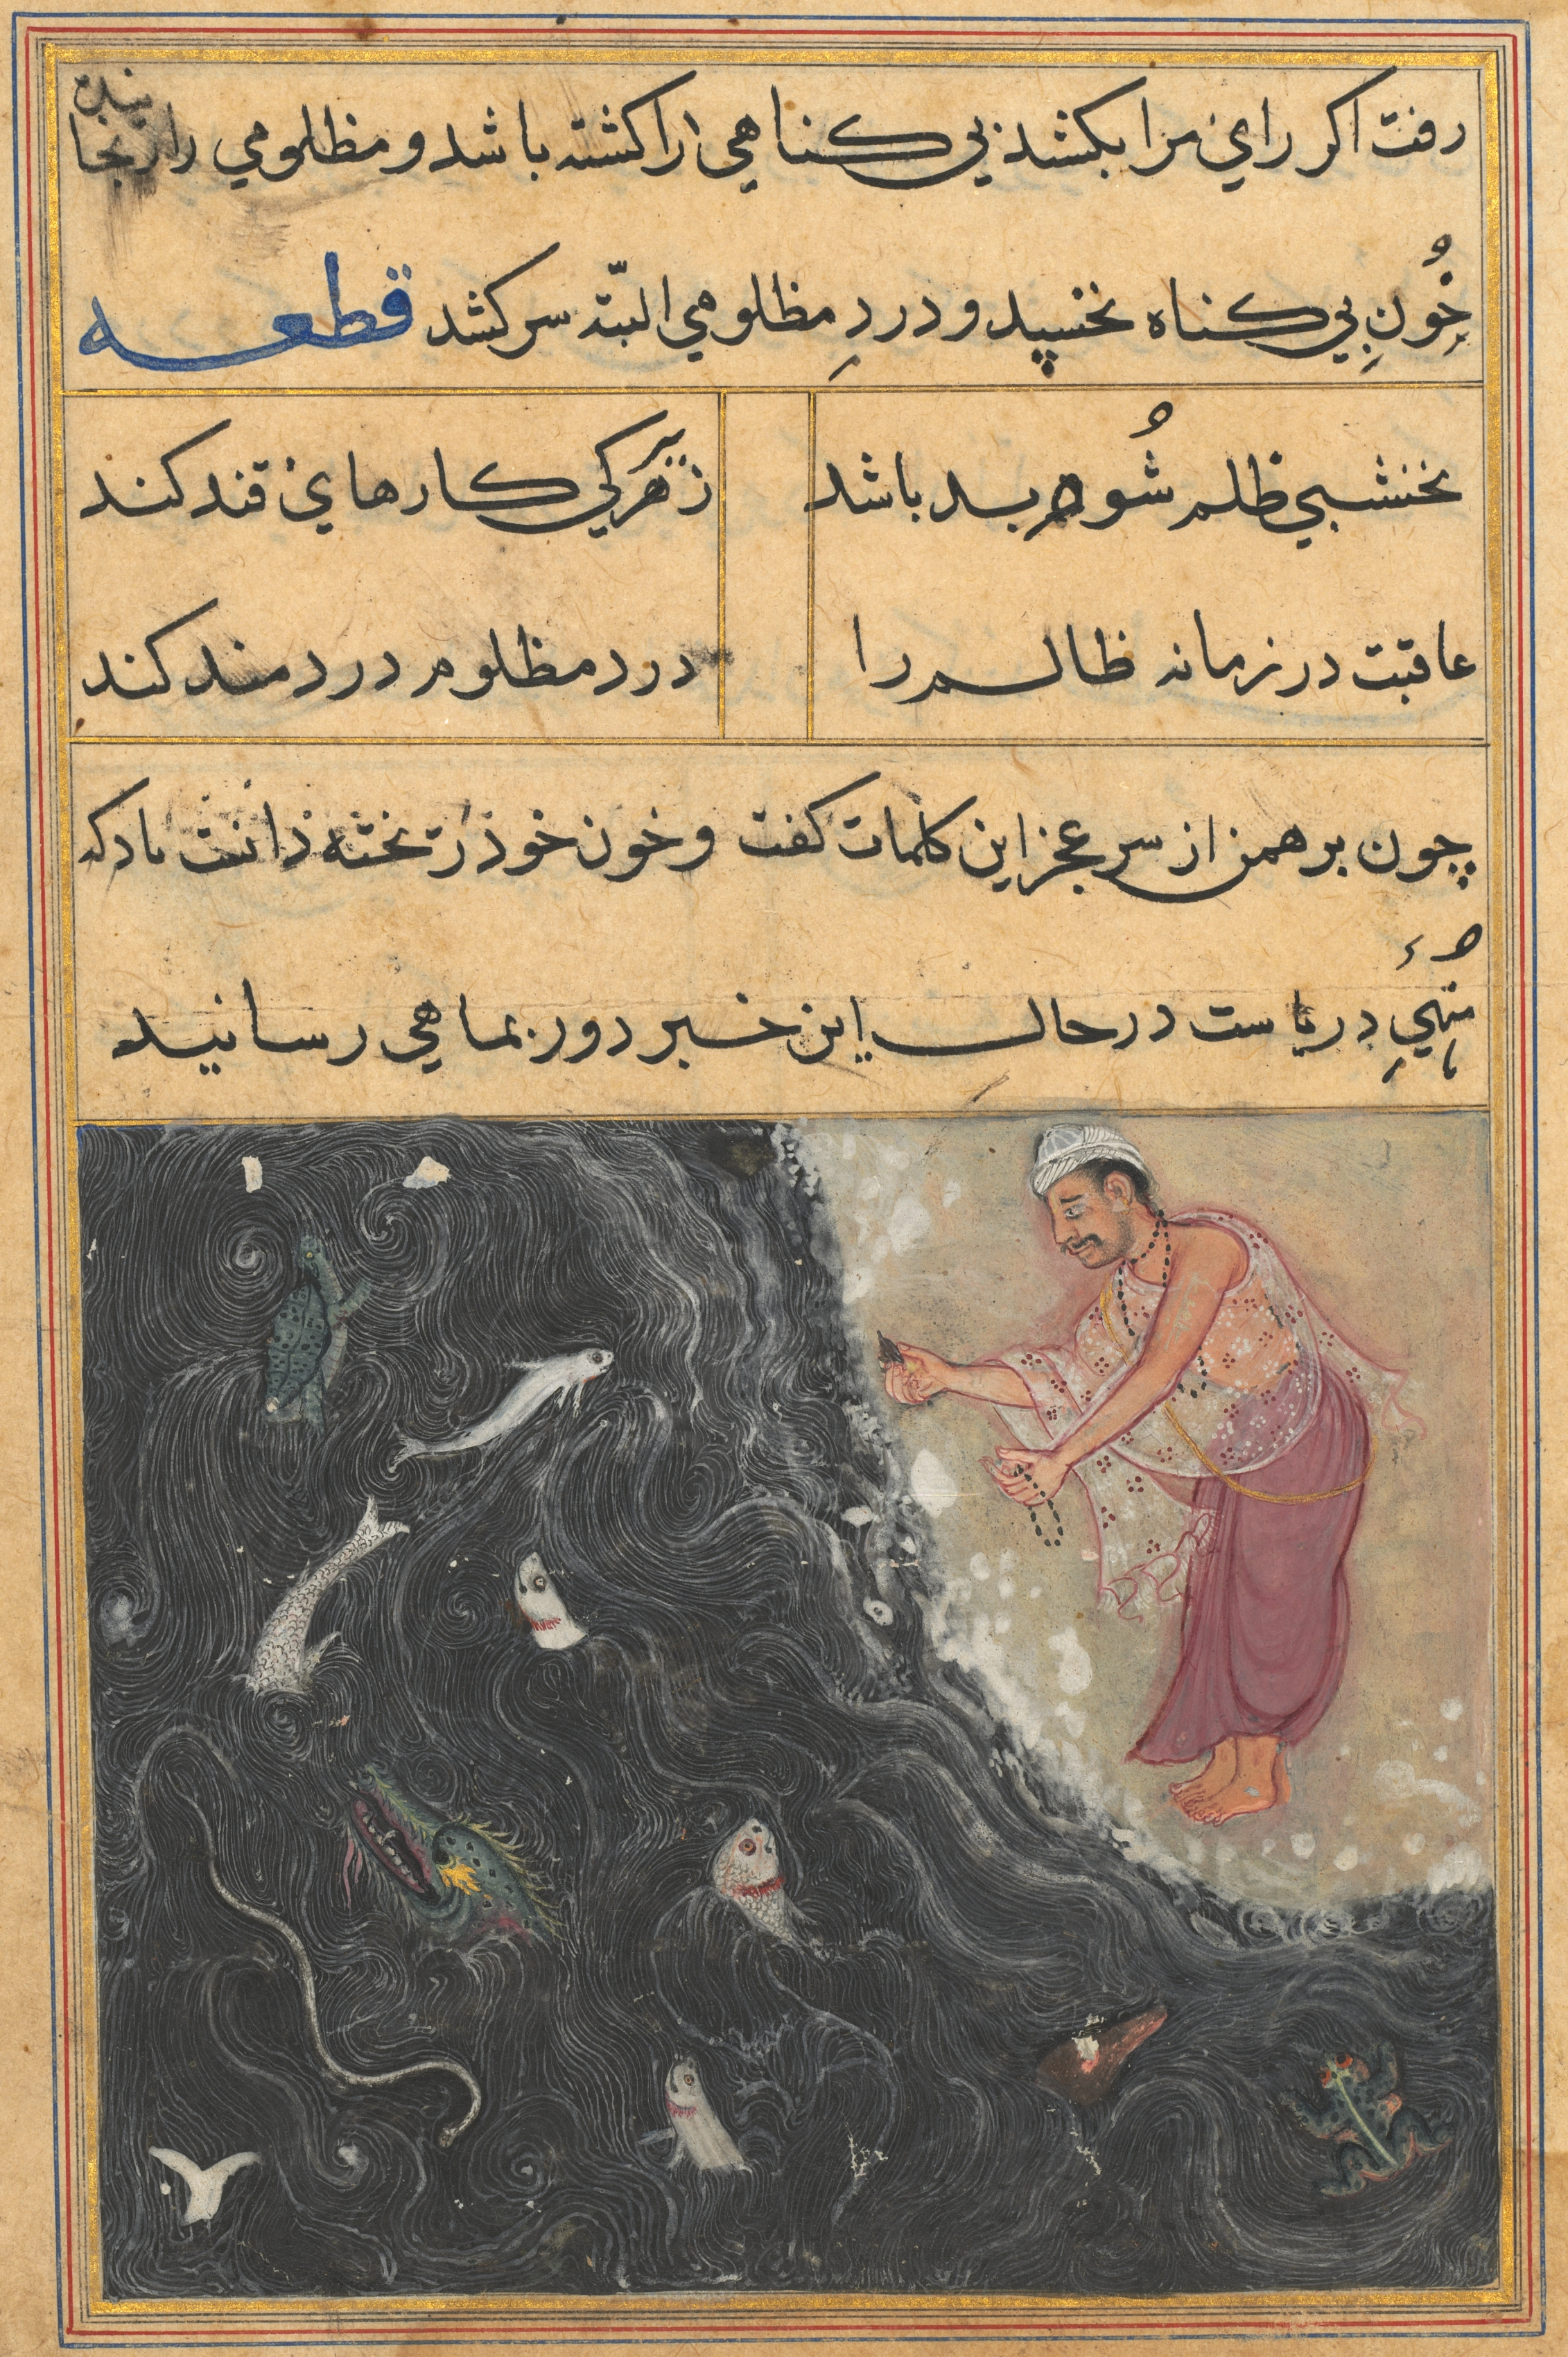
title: The creatures of the sea are asked by the king of the Ocean to take a message to the Brahman, from a Tuti-nama (Tales of a Parrot): Eleventh Night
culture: Mughal India, court of Akbar (reigned 1556–1605)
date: c. 1560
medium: gum tempera, ink, and gold on paper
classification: Painting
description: The creatures of the sea, by turn, refuse to convey the king of the ocean’s acceptance of the wedding invitation to the Brahman. The sea dragon in the upper right is concerned that he will frighten people, so he volunteered the whale. The whale said that he has no legs to walk on land, so volunteered the turtle. The turtle said he would be too slow and would never make it on time. The crab feared he would not be taken seriously, and the crocodile said that he is too rough and vulgar for the job. The frog agreed to go.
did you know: The sea dragon is chief of the many species under the Ocean King’s command.